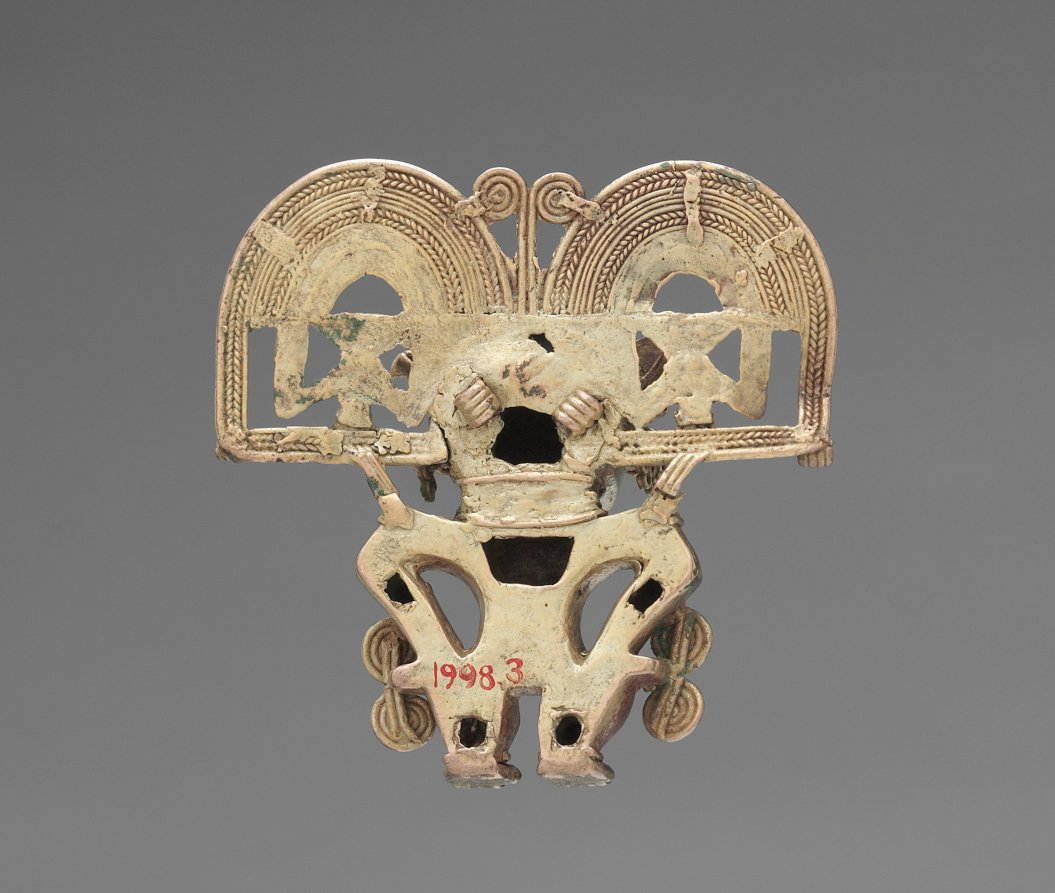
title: Figure Pendant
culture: Colombia, Tairona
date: 900–1550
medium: cast gold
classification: Metalwork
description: Tairona-style pendants are among the most spectacular of all ancient American gold ornaments, in part because of the detail achieved with lost-wax casting. The traits of the figure pendant include a lower lip ornament and a headdress in which two bats hang upside down. Although called caciques (chieftains)-that is, ruler portraits-the meaning of such figures is not well understood. Bird imagery was important in the isthmian region in ancient times and remains so today. For instance, among the modern Bribri of Costa Rica, the principal creator deity (Sibo) takes the form of a buzzard or kite who wears a collar. Collars are standard features of ancient bird pendants, like the one shown here.